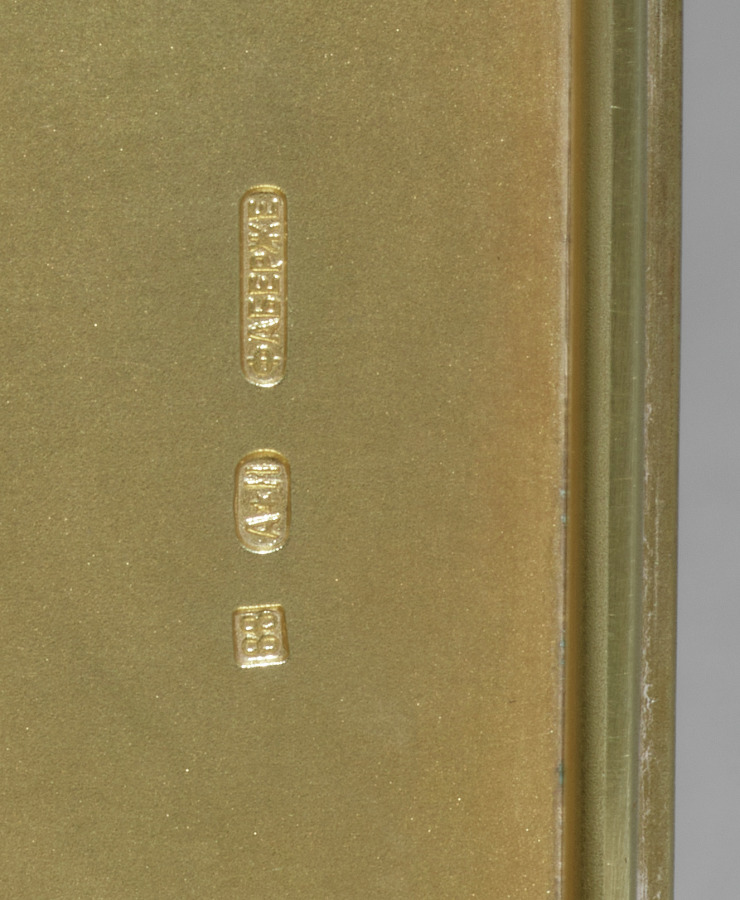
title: Cigarette Case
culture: Russian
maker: House of Fabergé (Russian, 1842–1918)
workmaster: August Hollming (Finnish, 1854–1913)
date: 1911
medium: Silver, ruby, textile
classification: Silver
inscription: Signed with initials of the workmaster August Hollming (active 1880-1913)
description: Fabergé offered variations of a cigarette case model such as this example, using different materials, surface treatments, and ornamentation. Accommodating individual clients’ wishes, the firm would also add a family insignia or additional decoration. The finely ridged surface demonstrates the superb handling of the precious metal by August Hollming, a Finnish master who worked for Fabergé in Saint Petersburg.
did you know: The cigarette case also includes a compartment for a match striker.